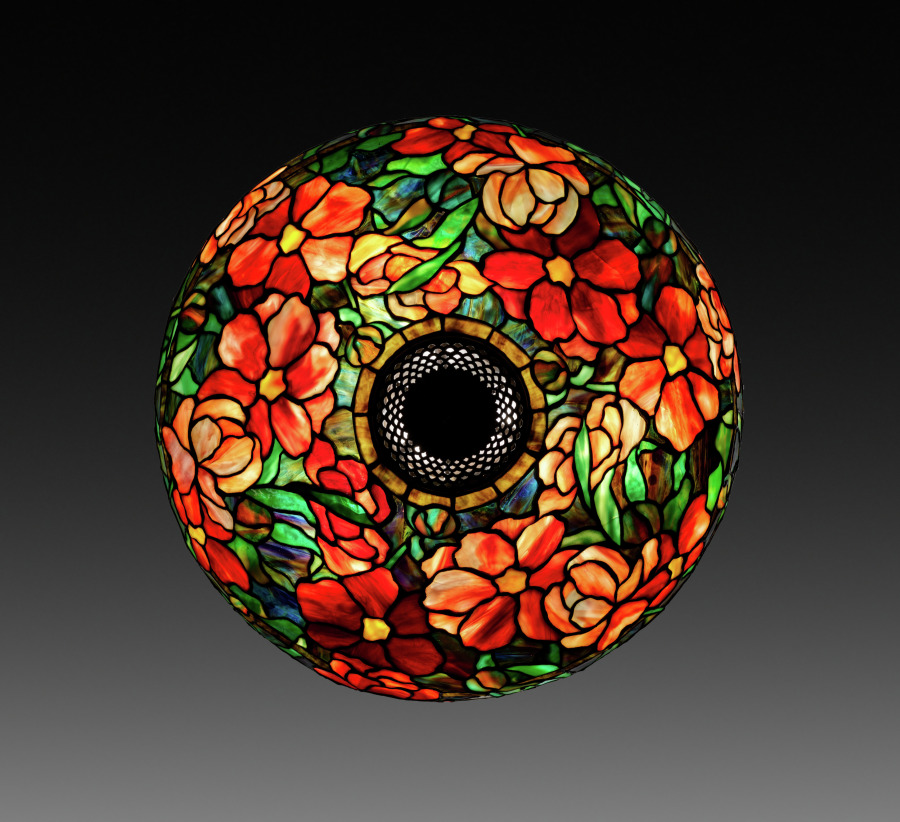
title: Peony Table Lamp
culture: America, New York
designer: probably by Clara Wolcott Driscoll (American, 1861–1944)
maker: Tiffany Studios (United States, New York, 1902–32)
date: c. 1905–15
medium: Leaded glass, bronze, ceramic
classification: Lamp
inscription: Shade impressed: TIFFANY STUDIOS NEW YORK 1475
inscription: Based scratched: BP250 L.C. Tiffany Bronze Pottery Favrile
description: In the 1870s a renewed emphasis on natural landscapes ushered in a generation of cottage gardeners who delighted in planting perennials in large quantities. Louis Comfort Tiffany was among those who championed the lush, sometimes wild-looking displays of varied floral species in the garden at his Long Island estate, Laurelton Hall. Tiffany encouraged his designers to take inspiration from his garden by shipping fresh cuttings almost weekly to his studios. Ohio native Clara Wolcott Driscoll and her team of female designers created floral patterns for lamps and mosaics based on the colorful blooms of spring that became among the most sought after and commercially successful of Tiffany’s production.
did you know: The base of this lamp looks like it is made of metal, but it is really just a ceramic base painted to look like bronze.